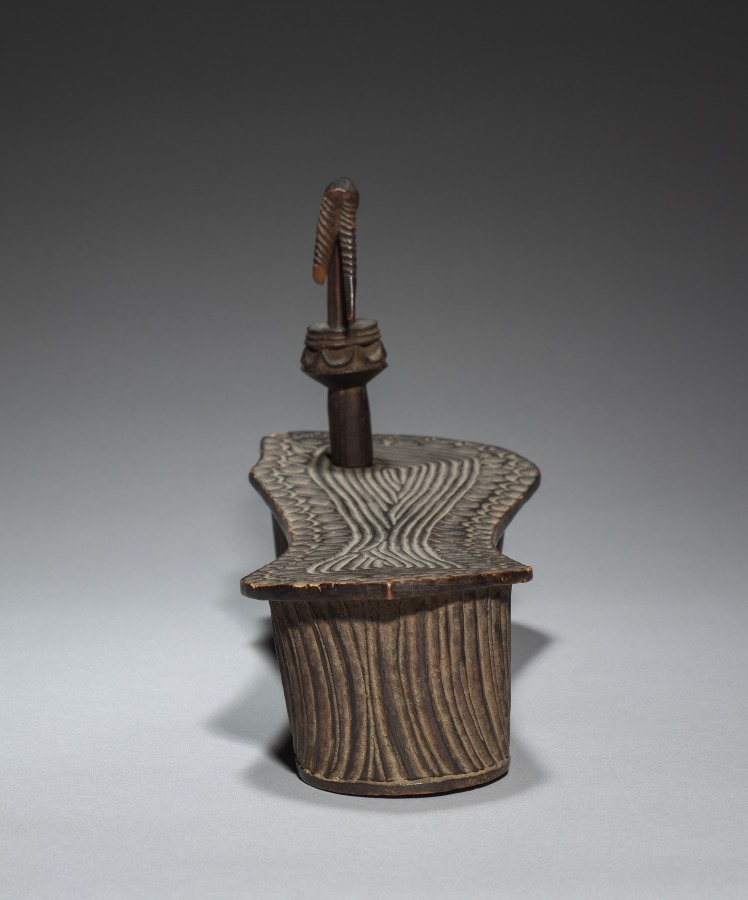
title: Sandal (mtalawanda / mtawanda) or Clog (kiatu cha mti)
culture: Africa, Central Africa, Democratic Republic of Congo, unidentified carver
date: c 1800s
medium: Wood and glass beads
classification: Wood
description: Common in the Indian Ocean region, wooden sandals changed meaning across place and time. This pair’s base elevates the foot as the toes grip an antelope-shaped peg (msuruaki). Crisp geometric sole designs suggest they were rarely worn. East African elites and merchants once had exclusive rights to wooden shoes, wearing elaborate ones only for portraits. Formerly enslaved people living along the coast wore simpler ones from the 1840s onward, adopting elite footwear to assert their liberation. However, slave traders like the Zanzibari “Tippu Tip” (c. 1832–1905) likely brought mitalawanda to Central Africa; stylistic elements of this pair hail from that region.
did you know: This distinctive footwear traveled from Southeast Asia and the Middle East to Africa, first to the Swahili Coast and then further inland to parts of Central Africa. The deity Krishna wears similar shoes (paduka) in an eighteenth-century Indian miniature painting (2003.344).